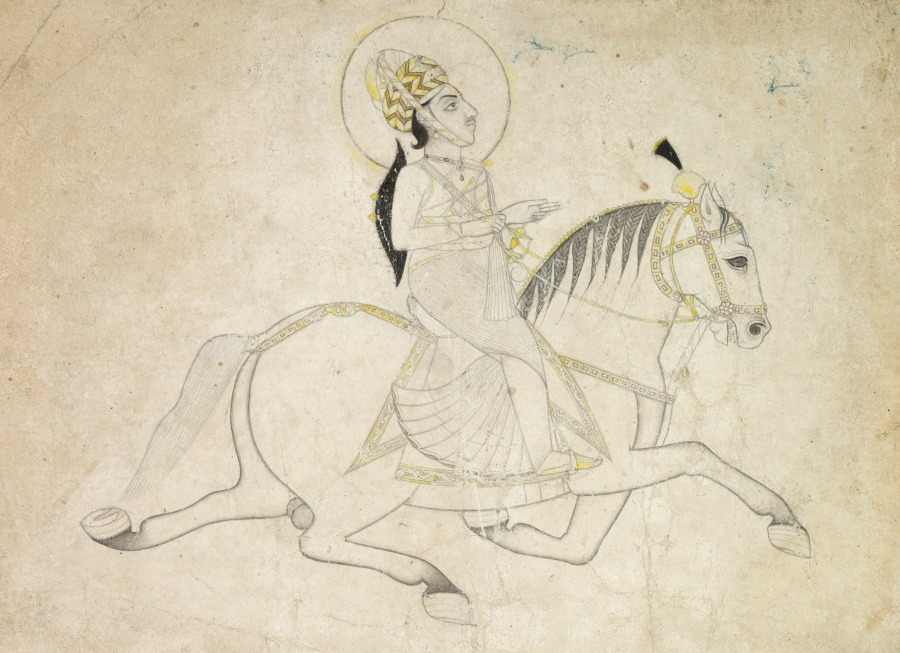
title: Jai Singh III of Jaipur (r. 1818–1835) Riding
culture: Northwestern India, Rajasthan, Jaipur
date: c. 1820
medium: Gum tempera and ink on paper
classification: Painting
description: In contrast to imperial Mughal painting and Western portraiture, native or Rajput Indian portraits are simpler and more monumental in design, standing essentially as symbols of general ideas. Here the Rajput ruler sits unaffected by the gallop of his mount, with the trappings of a warrior and the devotional marks of a follower of the Hindu god Vishnu on his forehead. He is depicted as an ideal warrior king, pious, in full control, gazing ahead abstractly as though seeing an immutable truth.